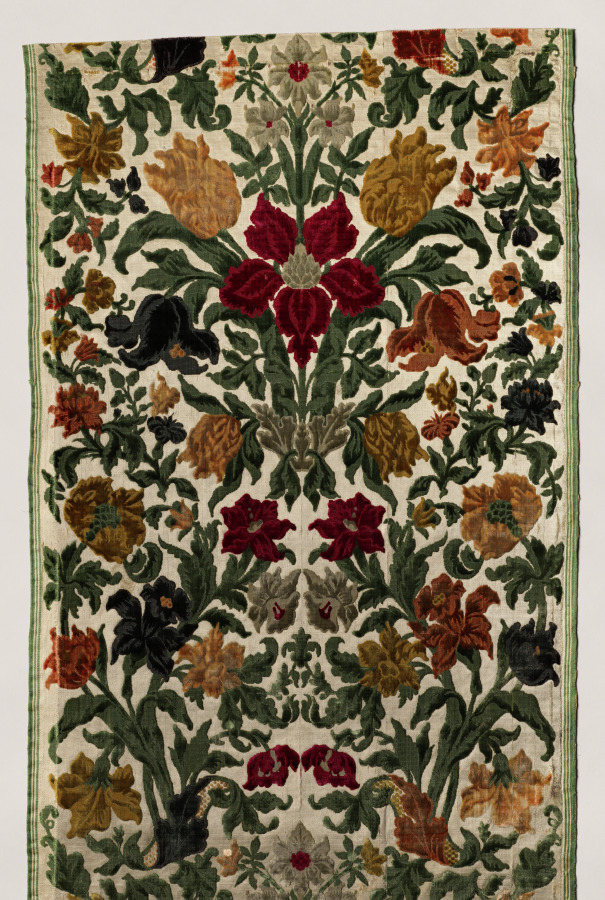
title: Length of Floral Velvet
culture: Italy, Genoa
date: 1600s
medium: velvet (cut, uncut, voided); silk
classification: Velvet